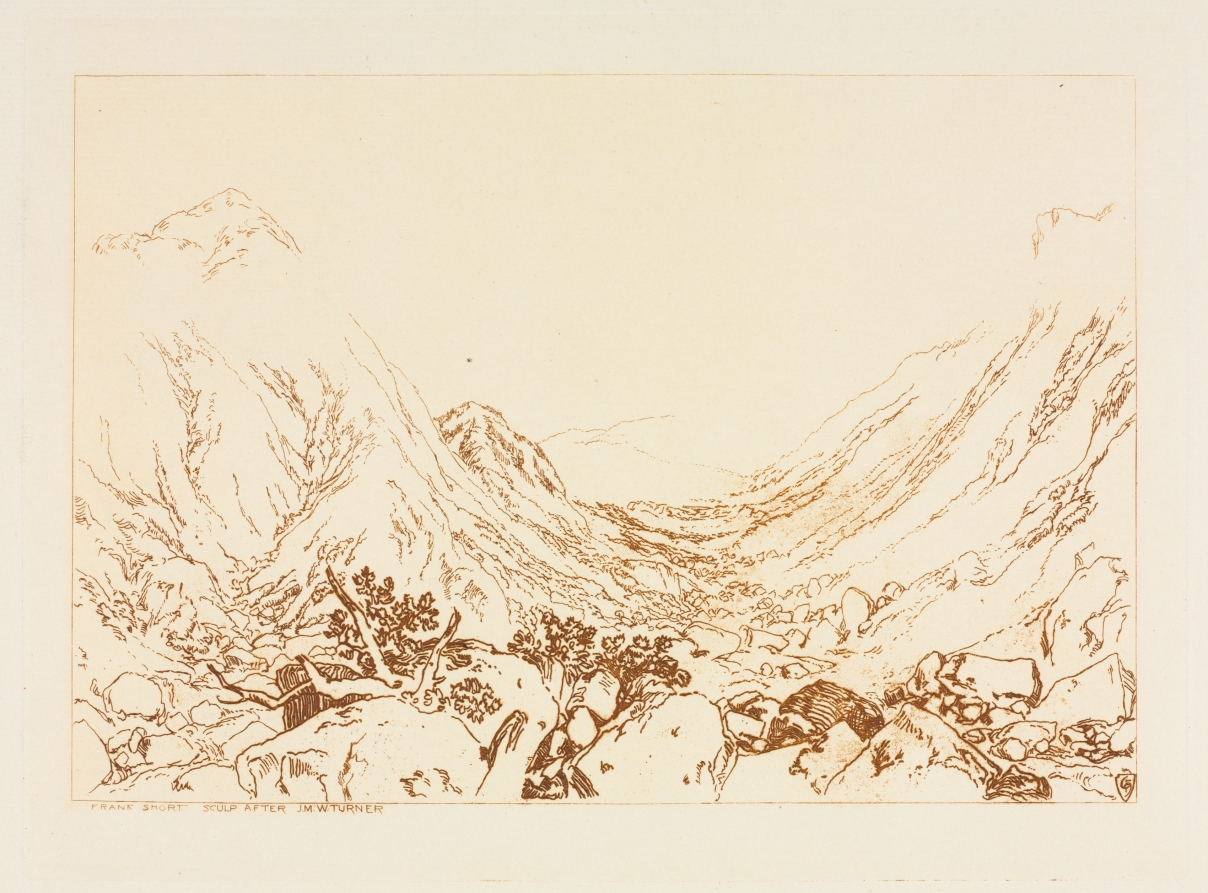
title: Ben Arthur, Scotland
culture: England, 19th century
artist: Frank Short (British, 1857–1945)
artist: after Joseph Mallord William Turner (British, 1775–1851)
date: 1884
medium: etching printed in brown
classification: Print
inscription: Lower right in pencil: "Frank Short" Printed below image: "FRANK SHORT SCULP AFTER JMW TURNER"